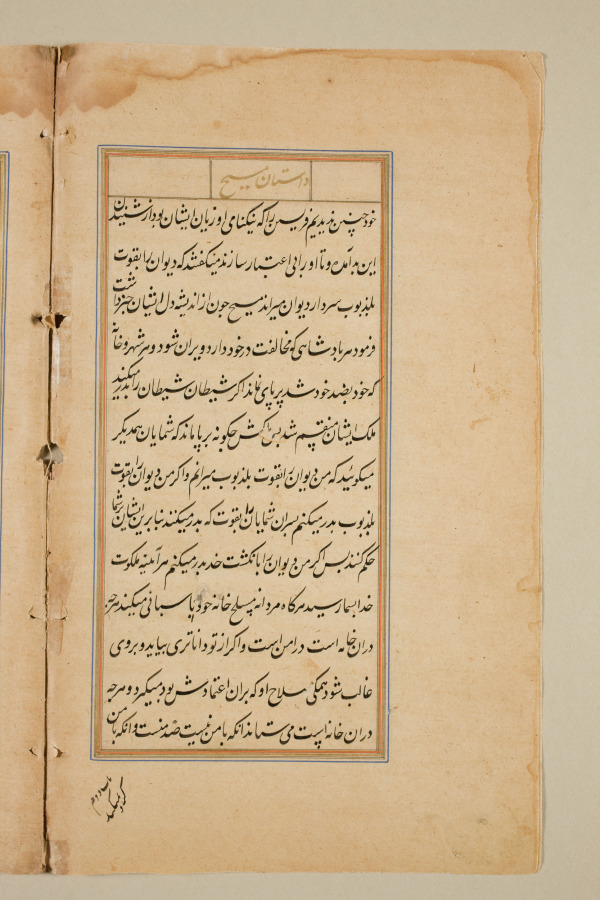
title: Text page from a Mirror of Holiness (Mir’at al-quds) of Father Jerome Xavier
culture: Mughal India, Allahabad, made for Prince Salim (1569–1627)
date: 1602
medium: Ink and gold on paper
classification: Manuscript